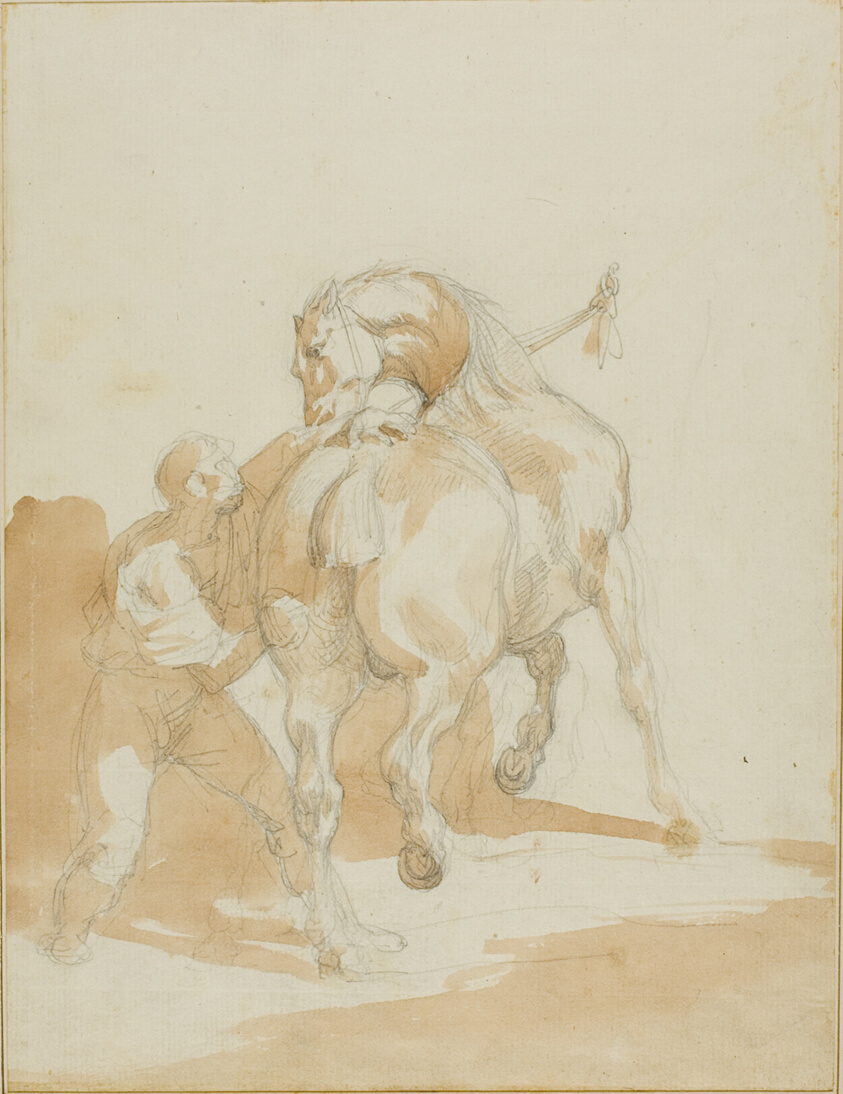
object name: Drawing and Watercolor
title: Stableboy Grooming a Horse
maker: Jean Louis André Théodore Géricault (French, 1791-1824)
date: 1814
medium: Graphite with brush and brown wash, on ivory laid paper, perimeter mounted on cream wove paper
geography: France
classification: graphite; drawings (visual works); prints and drawing